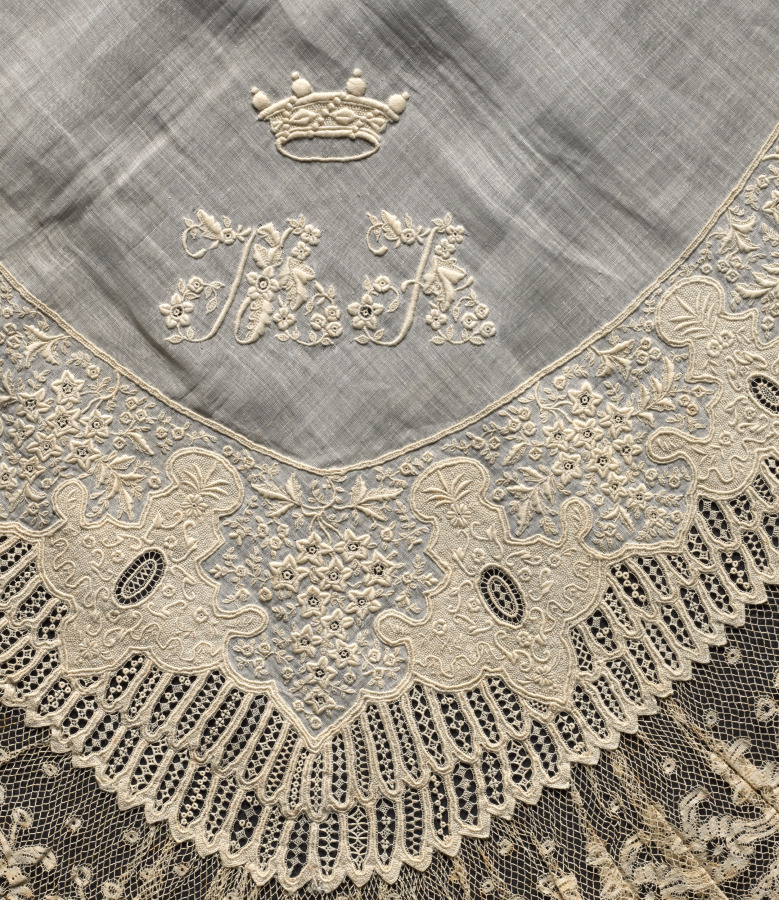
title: Lace Handkerchief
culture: Switzerland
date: 1850–99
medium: Plain weave linen center with bobbin lace (Valenciennes lace) edging and embroidery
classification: Embroidery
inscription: in one corner: "M.F." (?) with coronet above.